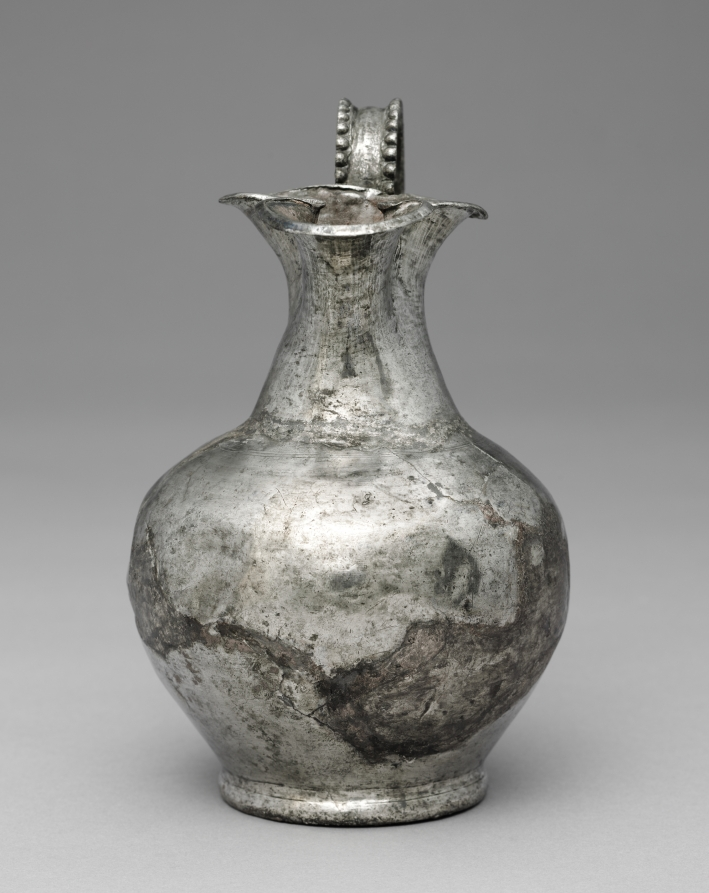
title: Ewer with a Trefoil (Three-Part) Spout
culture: Byzantium, Syria(?), Byzantine period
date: 300–600 CE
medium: silver with niello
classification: Metalwork